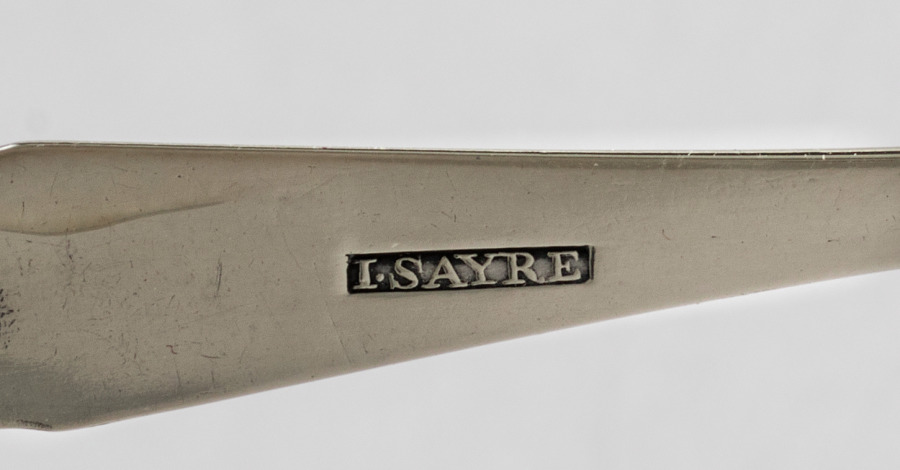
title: Sugar Tongs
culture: America, New York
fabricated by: John Sayre (American, 1771–1852)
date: c. 1800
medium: silver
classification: Silver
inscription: engraved "BMH" in bright-cut script within reserve on bow.